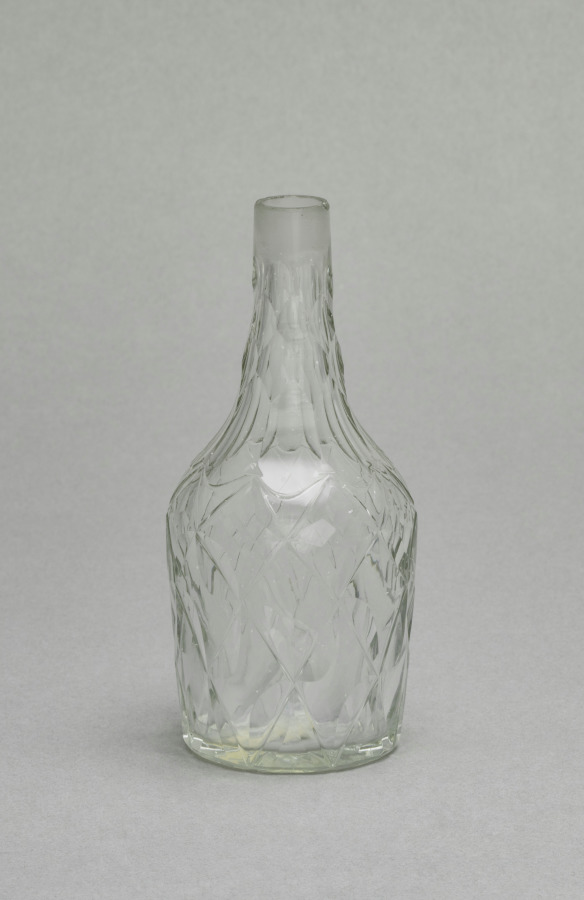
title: Cruet Stand (Bottle)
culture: France, bottle and cover old, but probably not original, 18th Century(?)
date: 1700s(?)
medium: silver and glass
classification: Metalwork